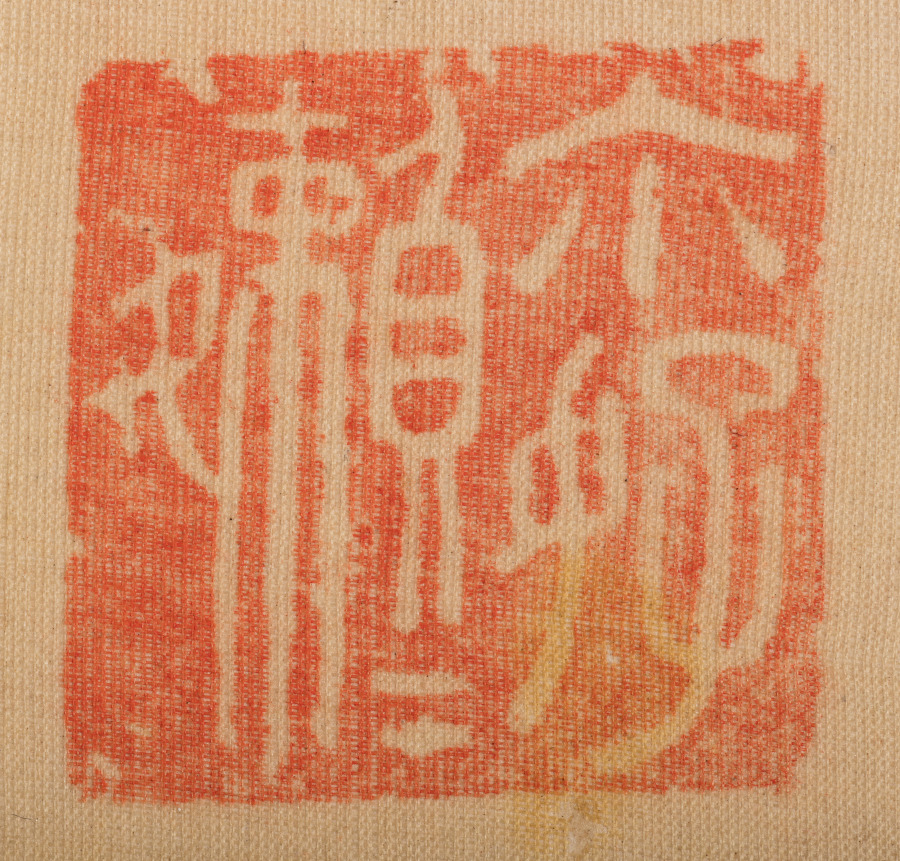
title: Orchids and Rocks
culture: Korea, Joseon dynasty (1392–1910)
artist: Yi Ha-eung (Korean, 1820–1898)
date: 1897–98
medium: Eight-panel folding screen; ink on silk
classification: Painting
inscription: Translation: [I] painted for the high minister Yangwon. [I] humbly request your corrections and advice [on my painting]. [By] an eighty-year old gentleman of rocks.)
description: Yi Ha-eung (1820−1898), the artist of this eight-panel folding screen, was one of the most influential men in late 19th-century Korea. Acting as the regent for his son, King Gojong (1852−1919), who ascended the throne at the age of thirteen, Yi ruled Korea from 1866 to 1873. In addition to his illustrious political career, Yi was also recognized as one of the most celebrated artists who led the revival of literati art in late 19th-century Korean art. In particular, he was recognized as the master of orchids, one of the “Four Gentlemen” (plum, orchid, chrysanthemum, and bamboo) themes. Solely relying on monochrome ink, Yi depicted the curvilinear silhouettes of cymbidium orchid leaves dramatically hanging down from cliffs. Growing in wilderness and redolent with fragrance, orchids were often associated with the perseverance of principled gentlemen, and thus became one of the most popular subjects of scholar-artists' paintings.On the upper right corner of the far left panel, Yi wrote a short inscription stating that he painted the work at the age of 80.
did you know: The artist of this elegant painting is the formidable politician Yi Ha-eung (1820–1898), who is known for a seclusion policy that aimed to protect Korea and its sovereignty from foreign influences.